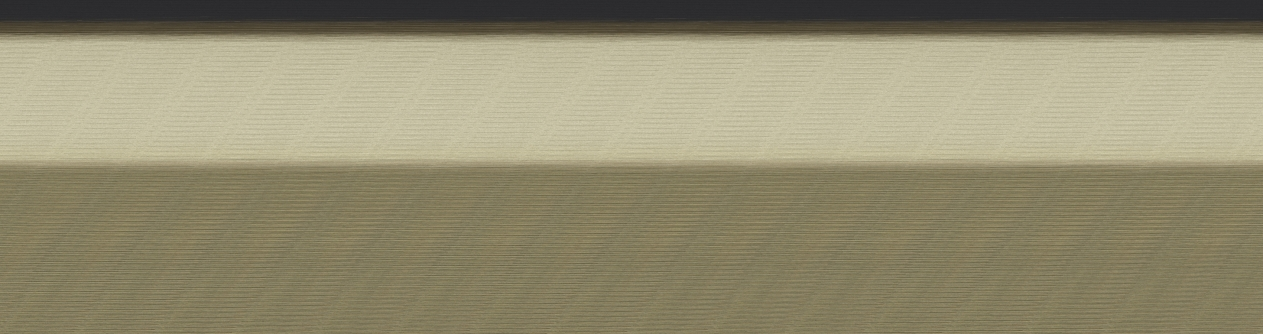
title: Palace Ladies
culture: China, Qing dynasty (1644-1911)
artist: copy after Qiu Ying (Chinese, 1494–1552)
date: 1644–1911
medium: handscroll, ink and color on silk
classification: Painting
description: This handscroll illustrates the pursuits of court ladies in a palace precinct on a spring day. Women, young girls, and their maids amuse themselves by sitting on a swing, playing games, watering and admiring peonies, performing music together, playing the qin (zither), feeding a parrot on the balustrade and fish in the water, or catching butterflies. The life of elite women was mostly restricted to the so-called inner quarters, meaning the garden and inner courts of the house. This painting idealizes the world of young palace girls that in fact was often filled with boredom and waiting for a lover.